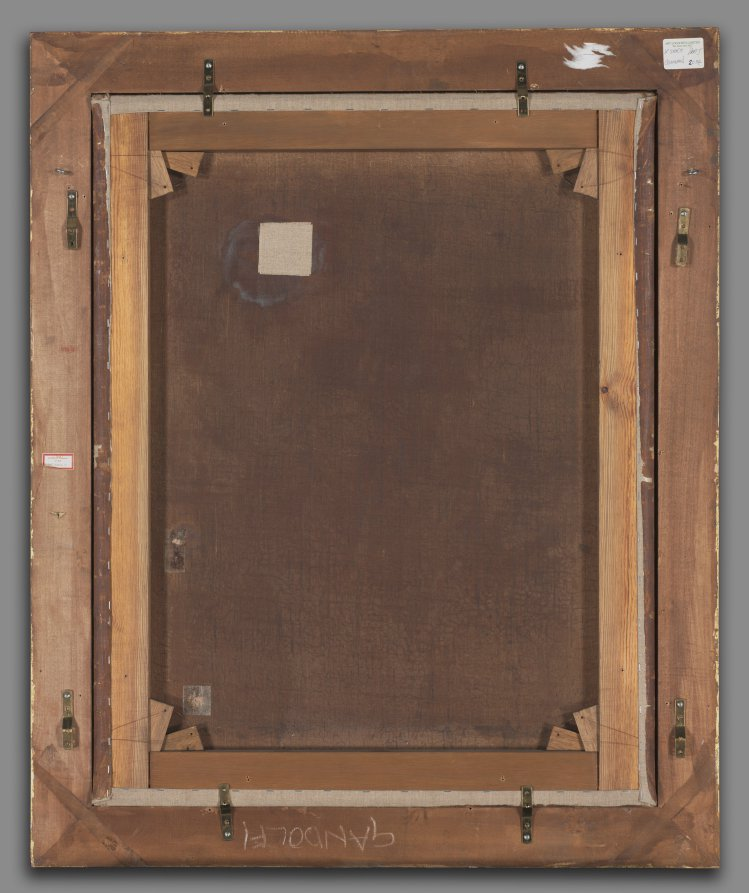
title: The Holy Family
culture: Italy, 18th century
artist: Gaetano Gandolfi (Italian, 1734–1802)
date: 1776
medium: oil on canvas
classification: Painting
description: A work of Gandolfi's later years, The Holy Family was exhibited in the religious festival at the church of San Procolo in Bologna in 1776. The painting's balanced composition, along with the suggestion of emotional connections among the figures, expresses the religious honesty of Gandolfi's art. Here St. Joseph holds the scriptures for the Christ child, who sits on his mother's lap; the elderly Joseph also holds the flowering rod, a sign from heaven that he was chosen to be Mary's husband. Joseph looks with concern toward Mary, who in turn looks up toward the cherubim hovering in a cloud at the upper left. Viewers of the private devotional painting were meant to understand that the young Christ reads of his future in the gospels, and that the suffering he will endure is reflected in Mary's sad gaze. Gandolfi was the most popular member of a prominent artistic family in Bologna. As both draftsman and painter he distinguished himself in religious, mythological, and genre subjects and was admired by his Italian and English patrons. He is known for his down-to-earth naturalism, typical of Bolognese art. The frame—although modern—is a "Gandolfini," so-called because the style was created for paintings by members of the Gandolfi family.